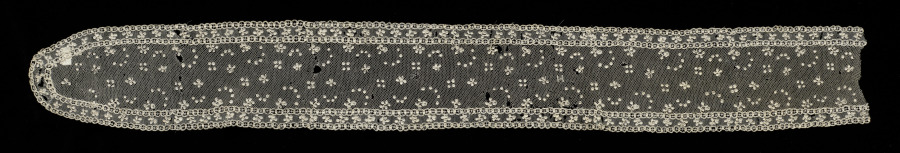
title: Lace Lappet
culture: France, Alençon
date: 1700s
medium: Linen: needle lace (Point d'Alençon)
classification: Lace